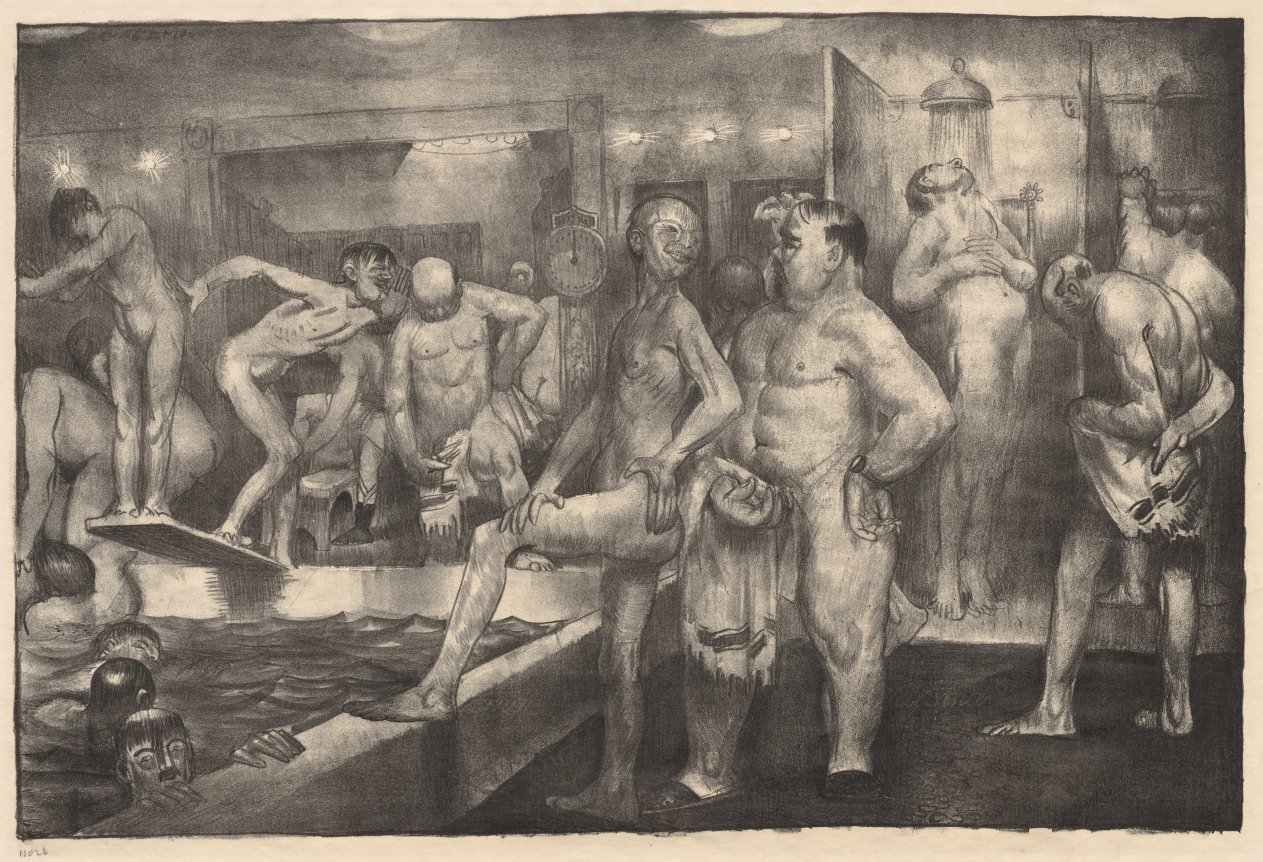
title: The Shower-bath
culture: America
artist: George Bellows (American, 1882–1925)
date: 1917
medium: lithograph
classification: Print